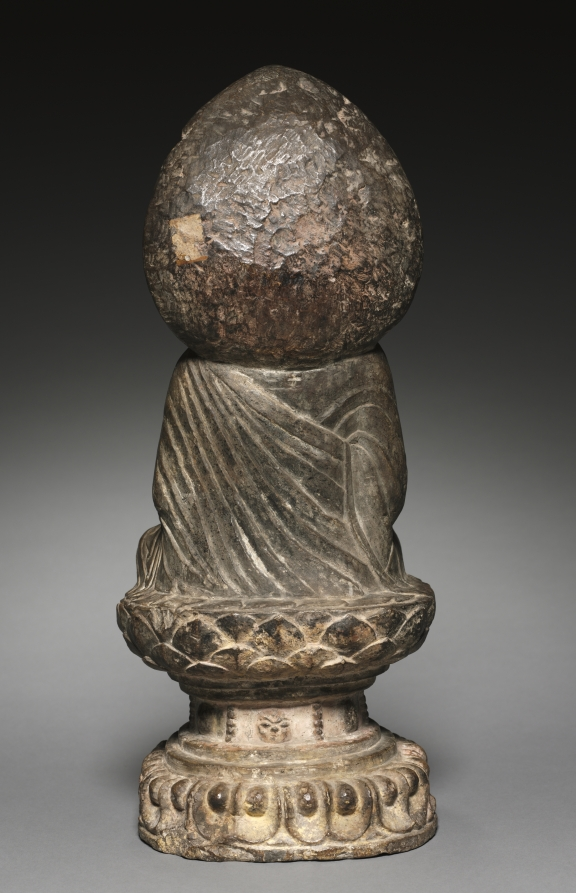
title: Amida Buddha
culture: China, Sui dynasty (581-618)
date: 581–618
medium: limestone with traces of polychromy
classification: Sculpture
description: The leaf-shaped halo of this seated Buddha bears the rare, unusual icon of the three nirmana Buddhas, which represents a symbolic homage of the Buddhas of the past, the present, and the future—manifestations of the Buddha in infinite time and space. Another interpretation is that the three figures without halos represent souls reborn in the Western Paradise thanks to Amida Buddha's divine intervention.